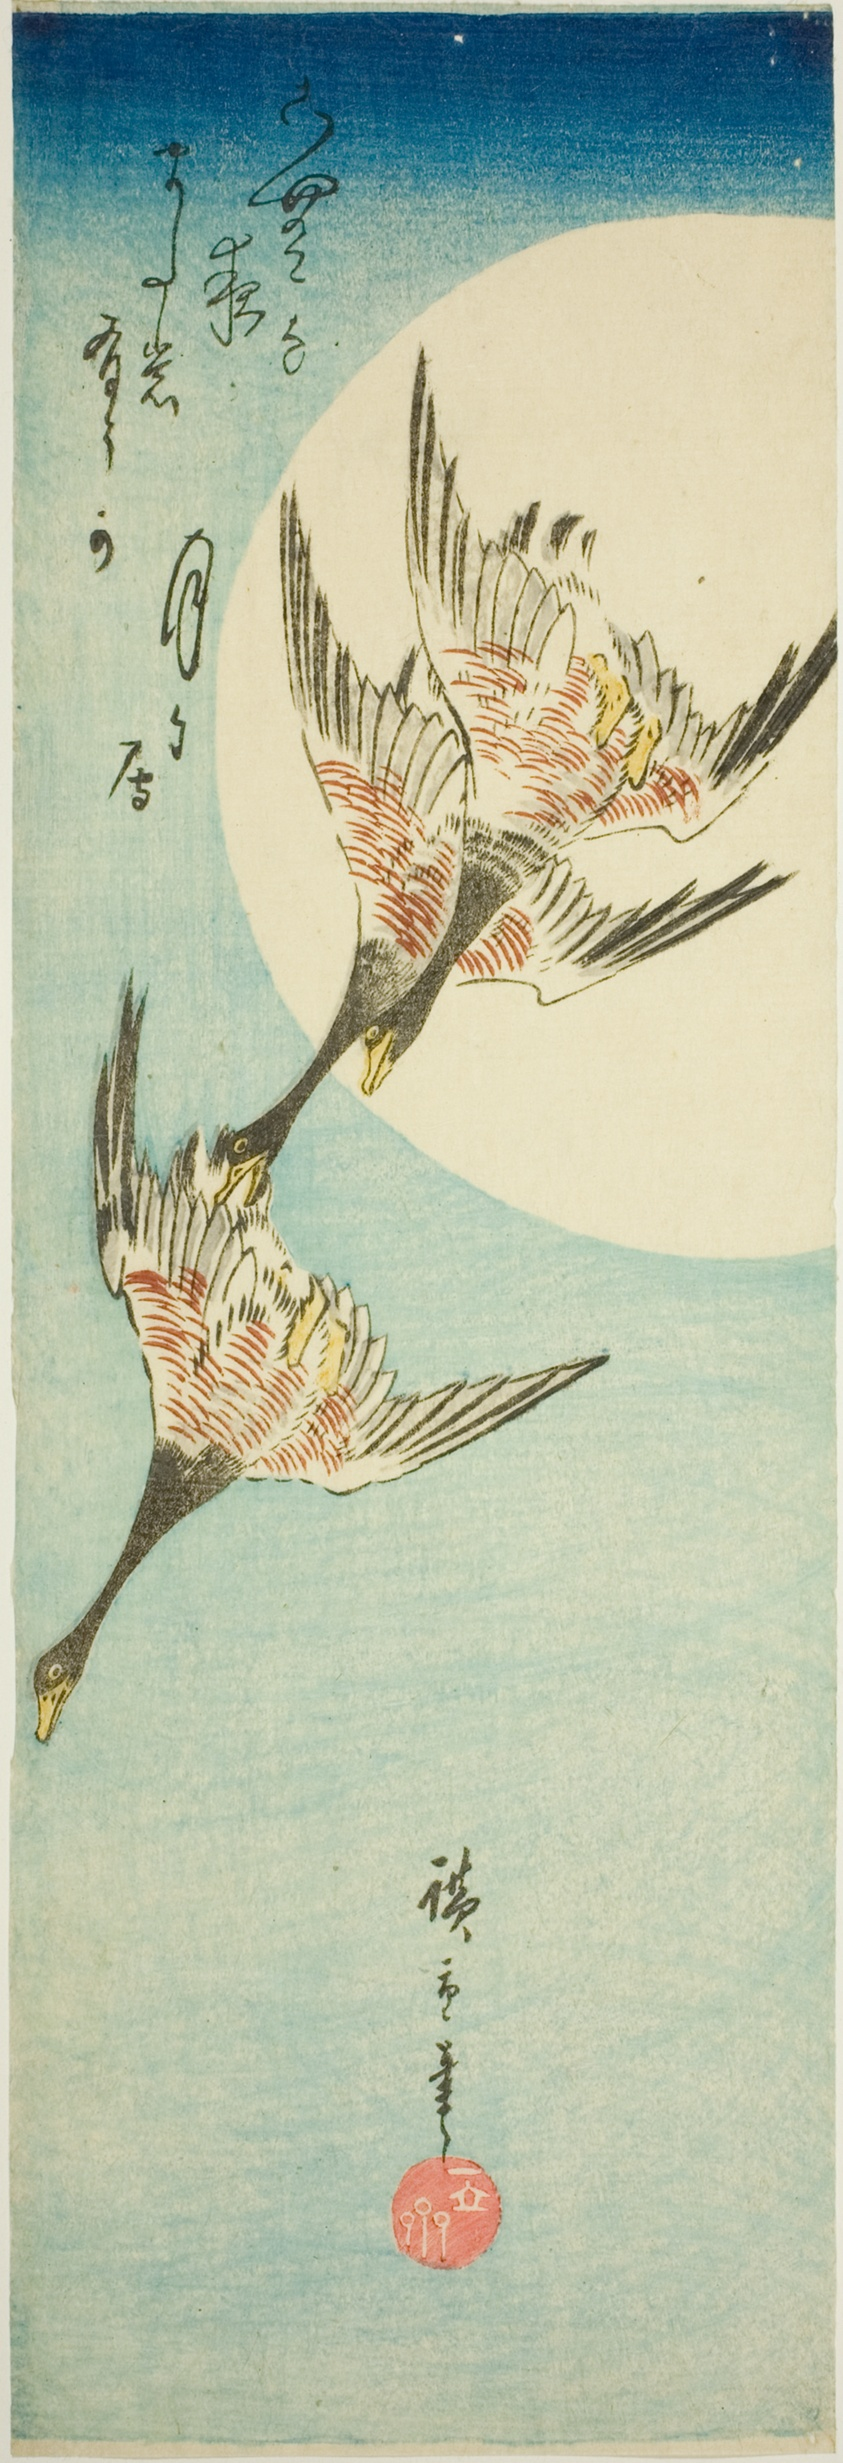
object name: Print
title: Wild Geese Flying Across Full Moon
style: Japanese (culture or style)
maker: Utagawa Hiroshige 歌川 広重; Japanese, 1797-1858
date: late 1830s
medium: Color woodblock print; aitanzaku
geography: Japan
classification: woodblock print; print; asian art